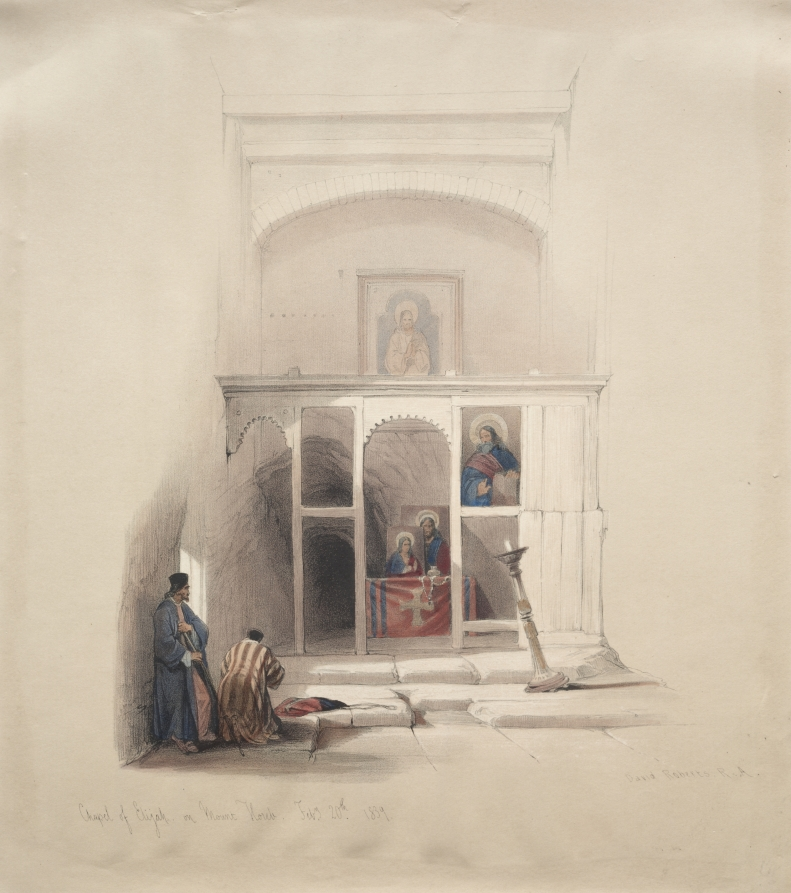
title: Chapel of Elijah on Mount Horeb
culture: England, 19th century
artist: David Roberts (Scottish, 1796–1864)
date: 1839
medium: color lithograph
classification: Print